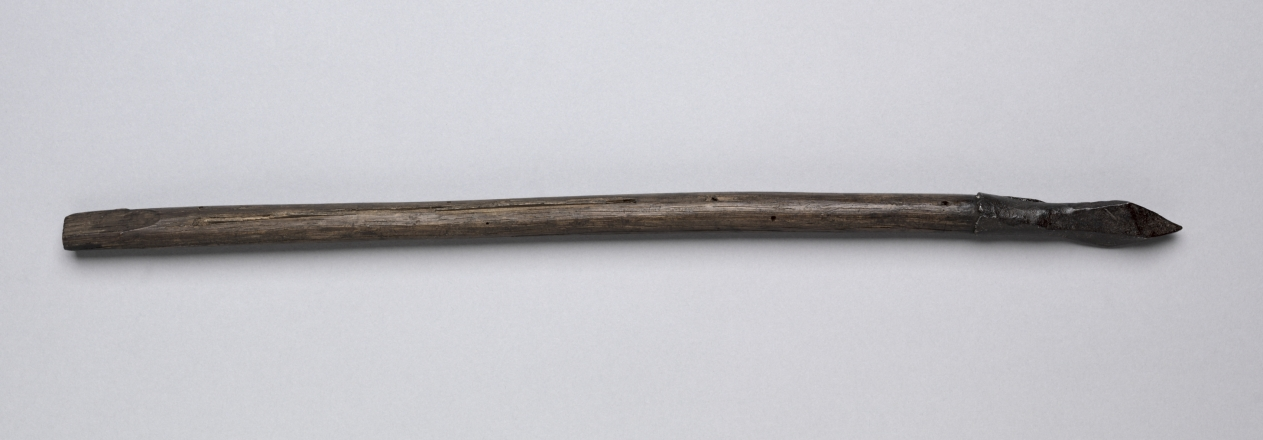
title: Crossbow Bolt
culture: Germany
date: 1500s-1600s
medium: wood, leather, steel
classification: Arms and Armor